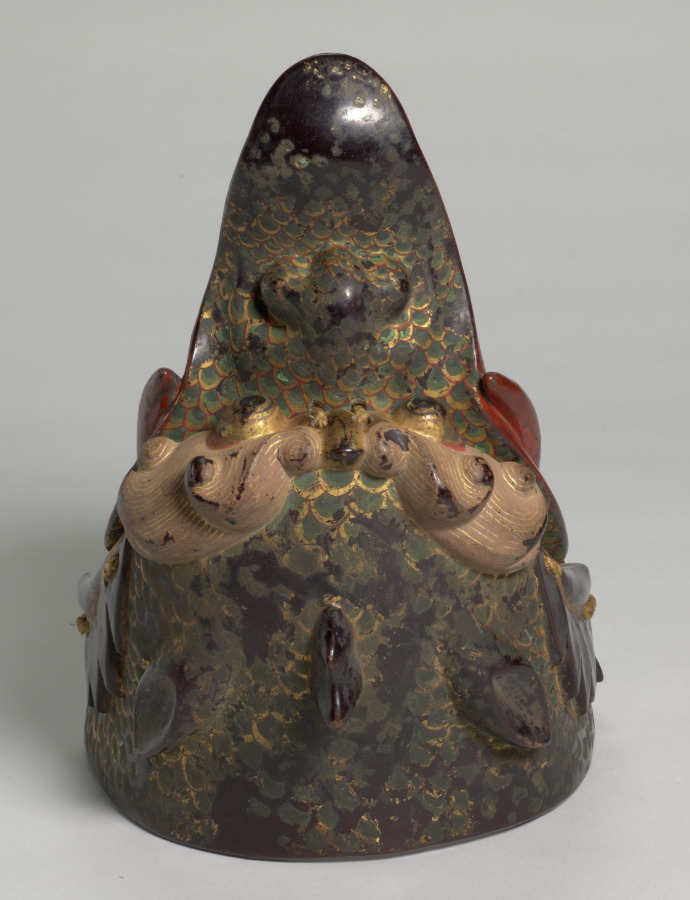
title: Shoulder Piece for a Gigaku Costume in the Form of a Dragon Head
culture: Japan, Kamakura period (1185–1333)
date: 1200s–early 1300s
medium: lacquered wood with color and gold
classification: Sculpture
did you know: This dragon head is made of three pieces of carved lacquered wood with movable jaws fastened with twine.